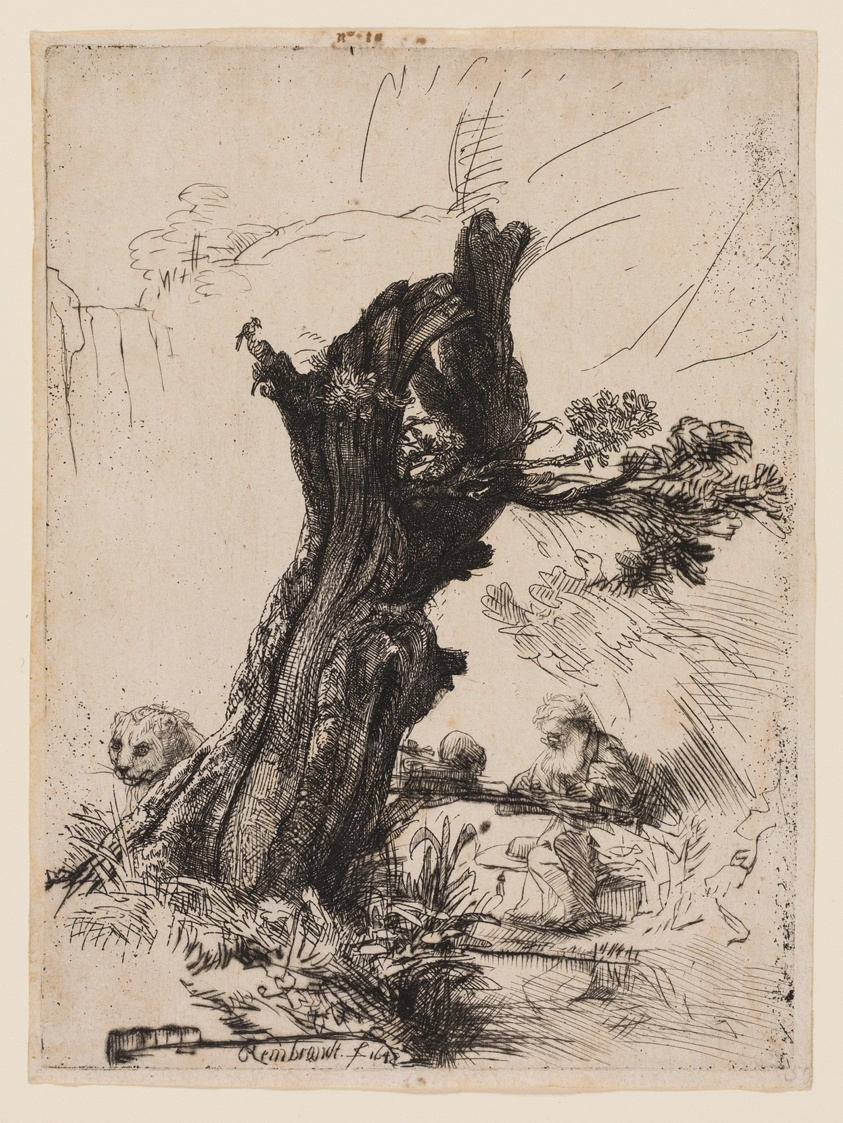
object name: Print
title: St. Jerome Beside a Pollard Willow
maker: Rembrandt van Rijn (Dutch, 1606-1669)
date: 1648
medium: Etching and drypoint on ivory laid paper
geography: Holland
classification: etching; print; prints and drawing; paper; drypoint